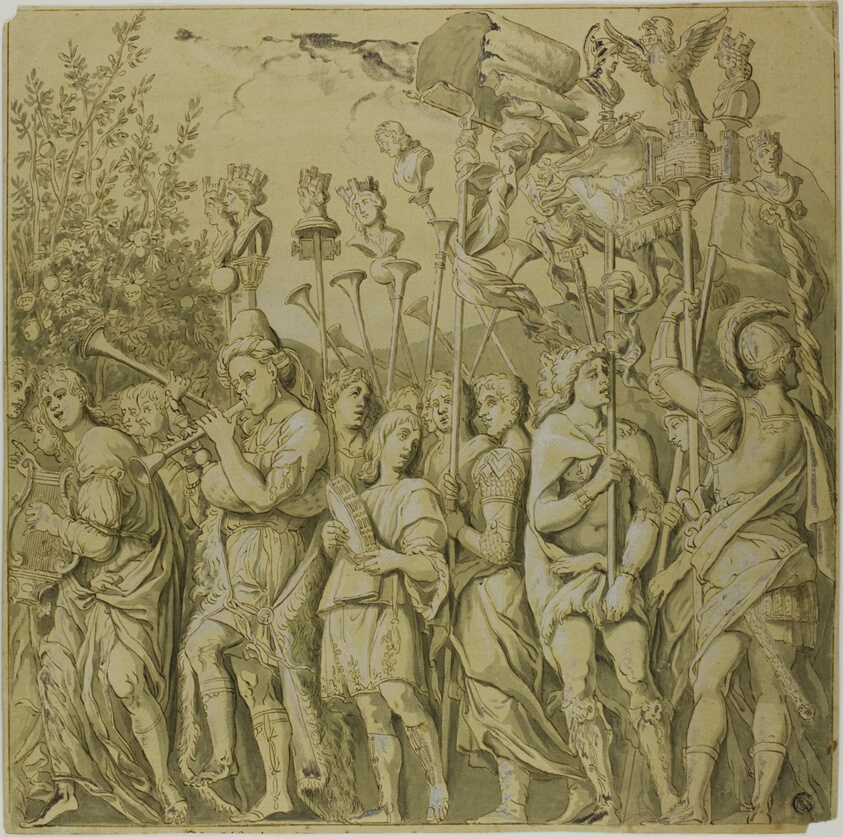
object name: Drawing and Watercolor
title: Triumphs of Julius Caesar: Canvas No. VII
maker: After Andrea Mantegna; Italian, 1431-1506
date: 18th century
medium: Pen and brown ink, with brush and gray wash, heightened with lead white (oxidized), on cream laid paper prepared with yellow wash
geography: Italy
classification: ink with wash; drawings (visual works); prints and drawing